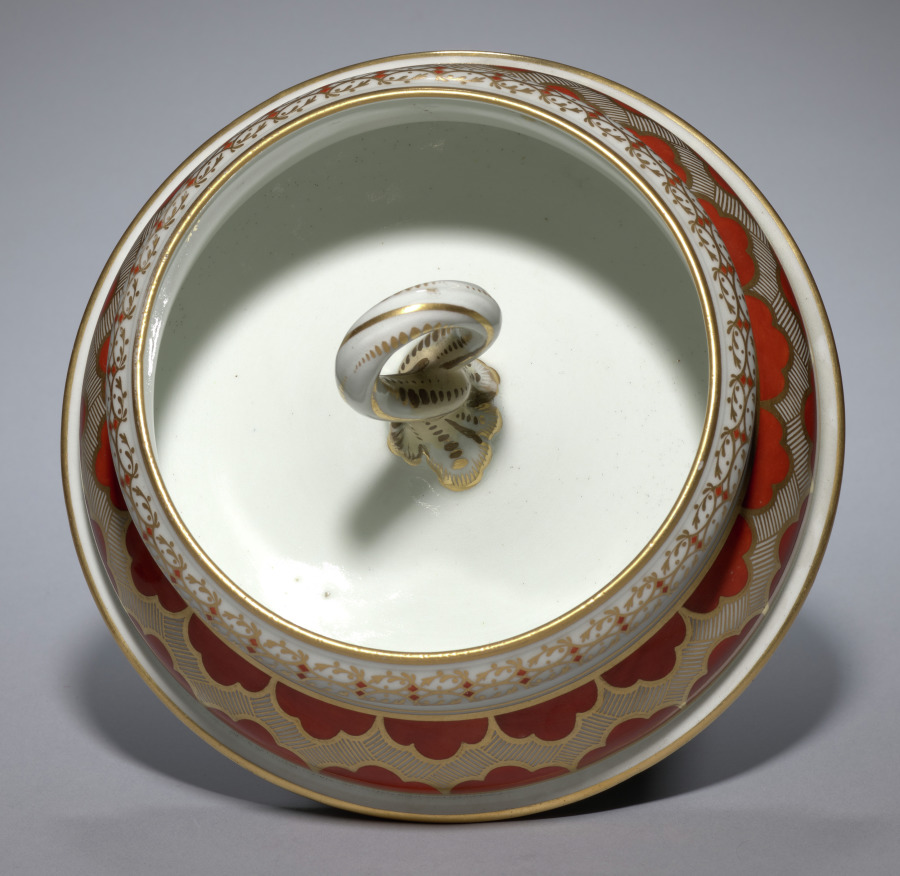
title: Cover for an Ice Pail (2 of 2)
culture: England, late 18th-early 19th Century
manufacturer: Flight & Barr (British)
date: c. 1792–1804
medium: porcelain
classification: Ceramic